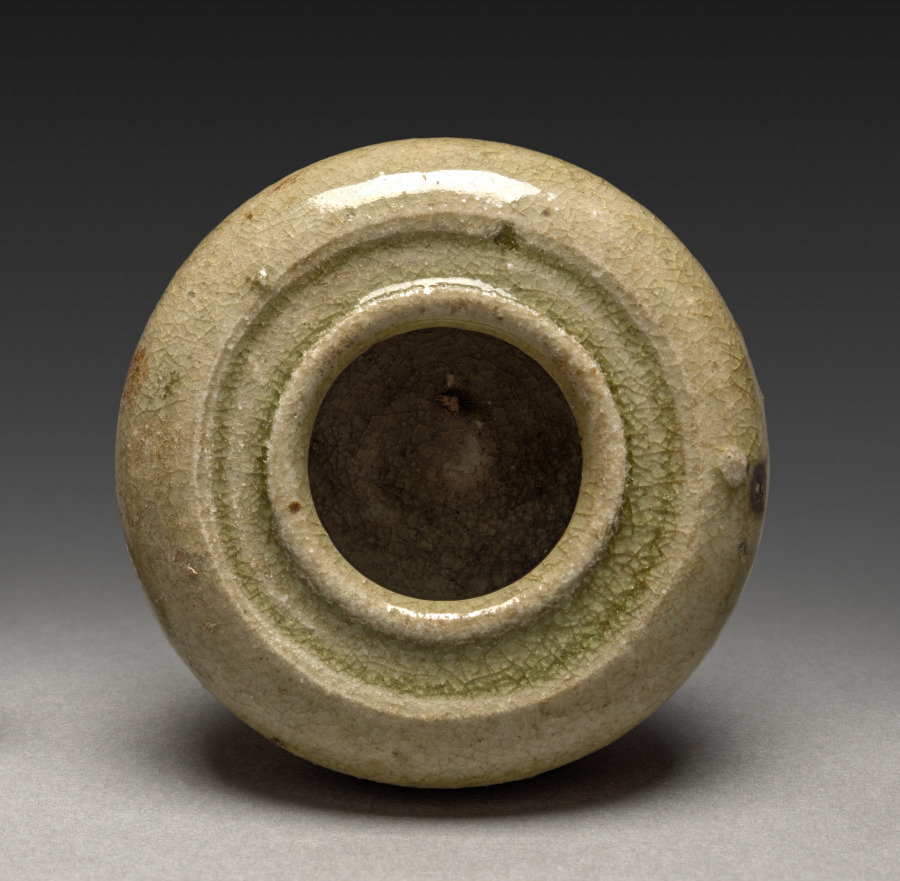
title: Incense Box: Seto Ware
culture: Japan, Kamakura period (1185–1333)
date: 1200s–1300s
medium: glazed stoneware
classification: Ceramic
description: Old Seto, also called Koseto ware, was typically coated with an ash glaze in the mineral feldspar, which produced a yellow or grayish-green glaze. This palette appealed to medieval Buddhist priests and samurai alike. The practice of burning incense in religious, court, and domestic settings dates from the early 700s in Japan.